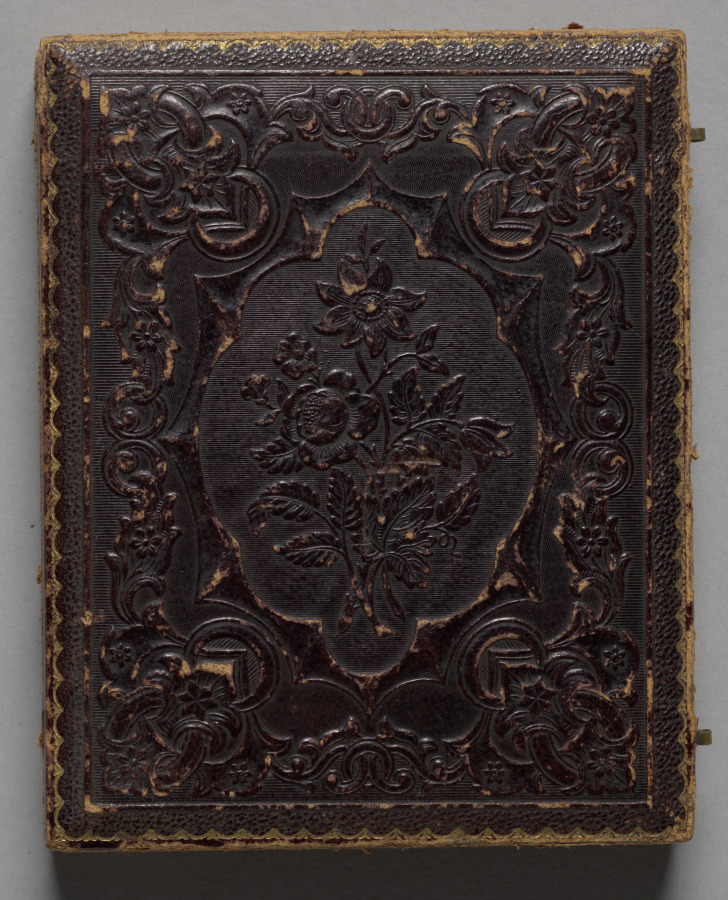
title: Three Carpenters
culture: America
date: c. 1858–65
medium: ambrotype, quarter plate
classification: Photograph